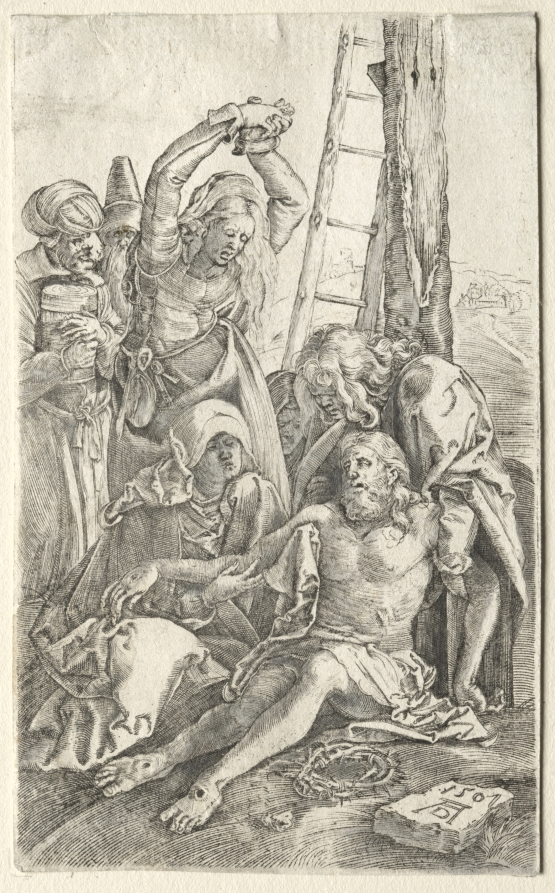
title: Descent from the Cross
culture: Germany, early 16th Century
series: The Engraved Passion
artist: copy after Albrecht Dürer (German, 1471–1528)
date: c. 1504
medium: engraving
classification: Print